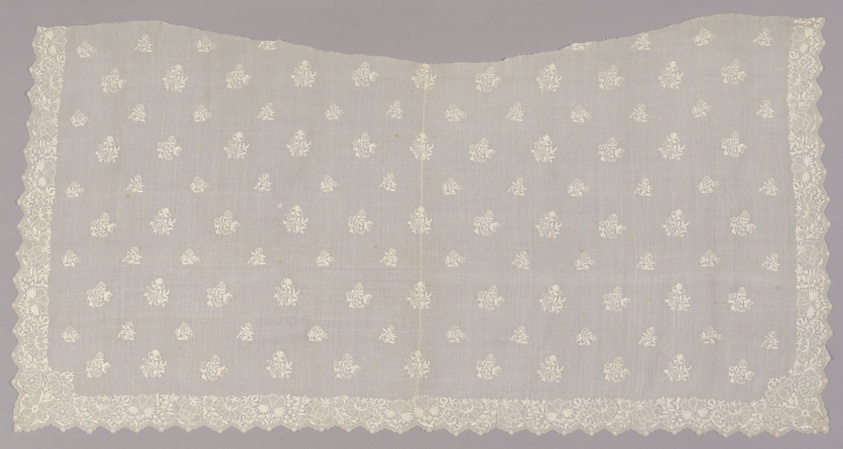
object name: Costume and Accessories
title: Apron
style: 18th Century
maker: England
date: 1760s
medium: Cotton, plain weave; drawnwork and embroidery in cotton, satin, buttonhole, chain, and double chain stitches with linen thread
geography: England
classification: textile; costume accessory; needlework (visual works); costume; dress (garment); clothing; apron (main garment); costume - embroidery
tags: flowers, floral patterns, floral, floral motifs